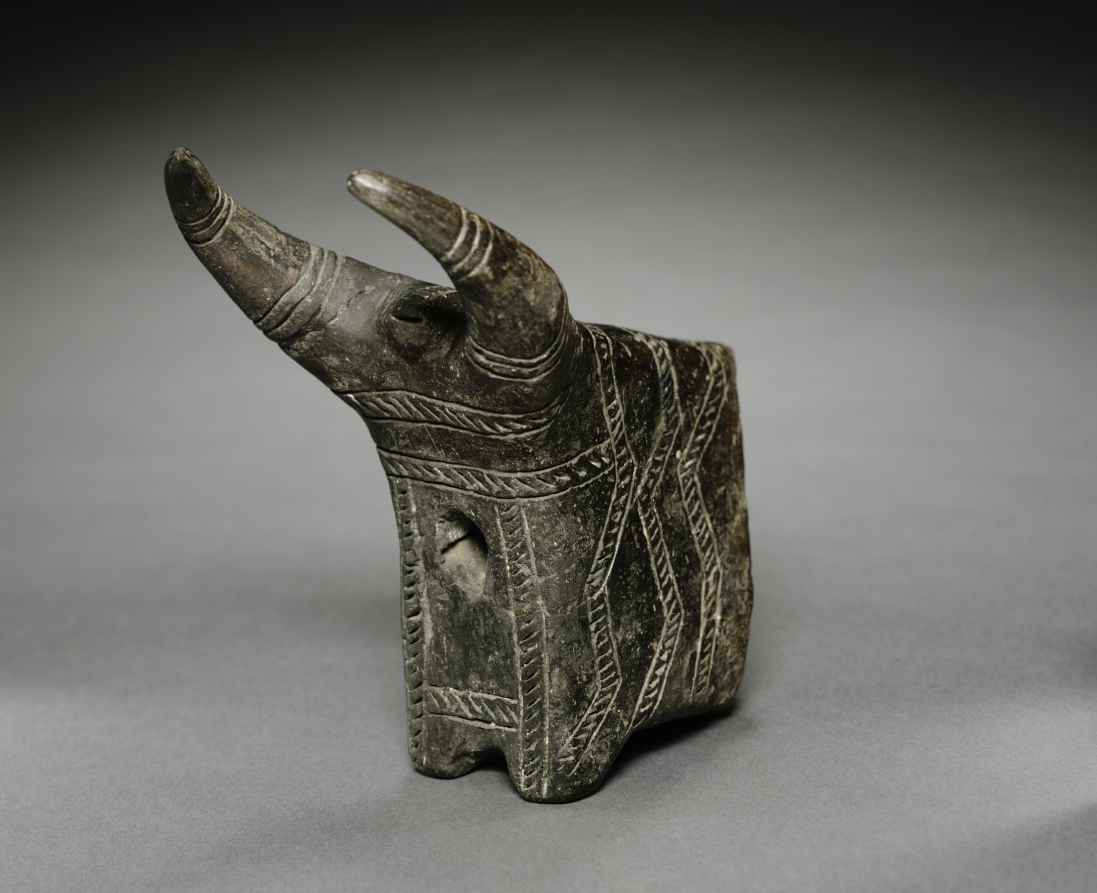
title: Bull Protome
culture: Cyprus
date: 2000–1000 BCE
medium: terracotta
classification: Ceramic